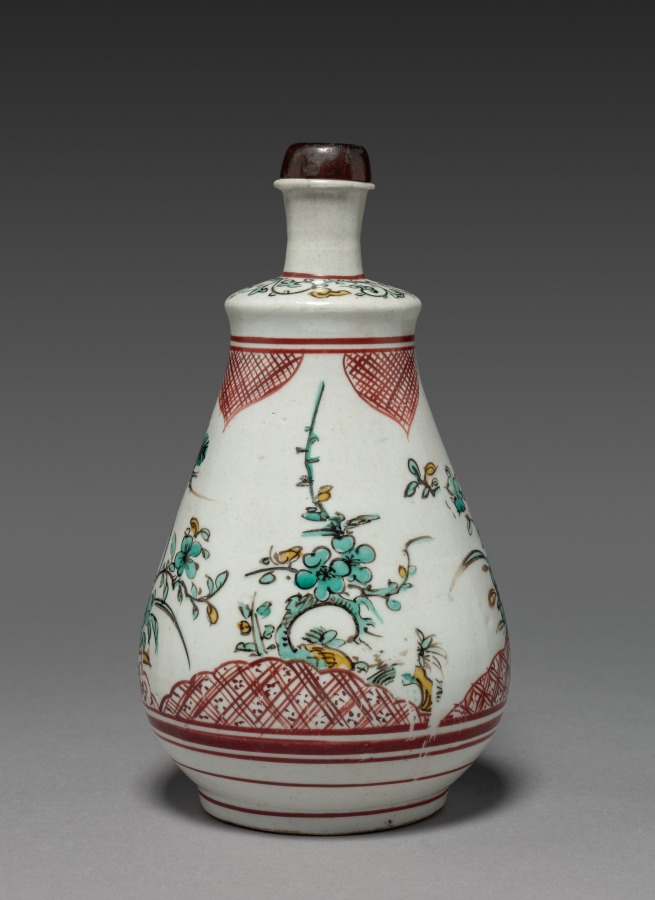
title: Wine Bottle with Plum and Pine Tree Design: Ko Imari Type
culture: Japan, Edo period (1615–1868)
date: late 1600s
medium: porcelain with underglaze enamel decoration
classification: Ceramic